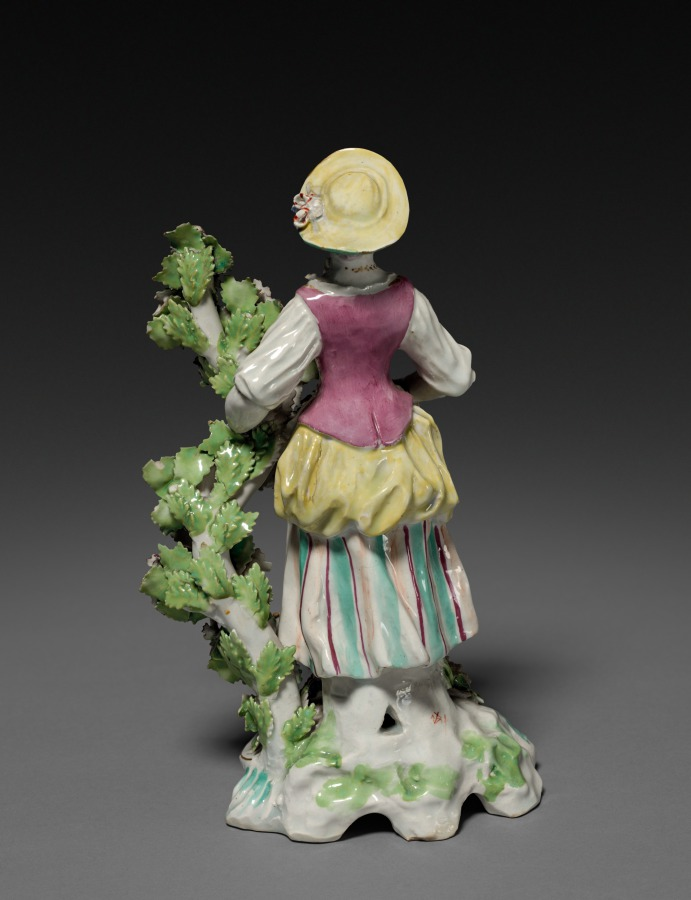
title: Figure of a Gardener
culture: England, London, Bow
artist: Bow Porcelain Factory (British)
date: c. 1765–70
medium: soft-paste porcelain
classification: Ceramic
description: Even though this figure and her counterpart (1945.37) are not accompanied by a sheep, these ceramic sculptures were sometimes known as “Garland Shepherds” during the mid-1700s. The name derived from a similar set produced by one of the Bow Porcelain Factory’s rivals, the Derby Porcelain Factory, in which the male figure holds a lamb. While these two factories often produced similar sets of pastoral, allegorical, biographical, and religious figures, the Bow Factory was known as one of the preeminent porcelain manufacturers, rivaled only by the Chelsea Porcelain Factory, with which Bow would later merge.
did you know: Due to the abundance of flowers surrounding this figure, this Gardener has also been considered a personification of Spring.